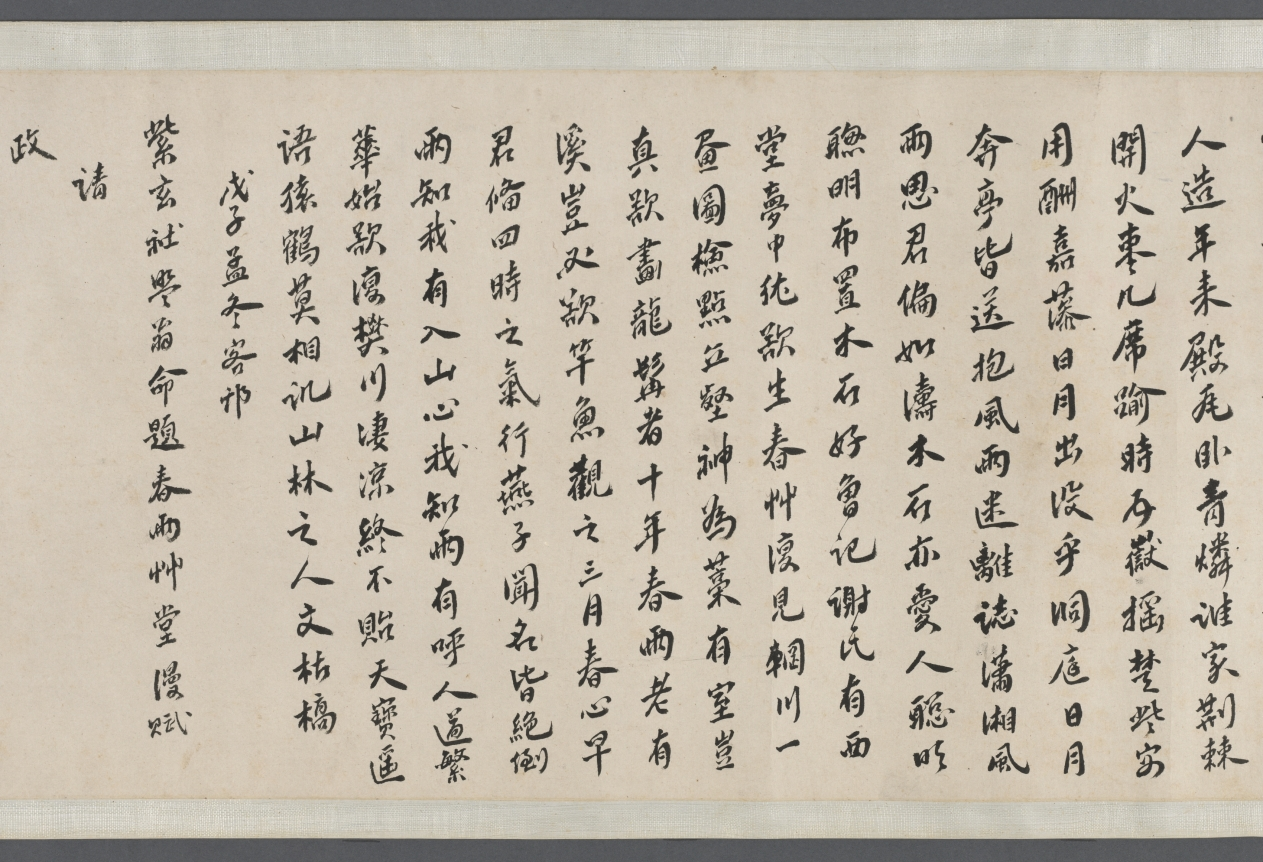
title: Spring Rain Thatched Hut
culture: China, Qing dynasty (1644-1911)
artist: Wang Jianzhang (Chinese, active 1621–1662)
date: 1650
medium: handscroll, ink on paper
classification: Drawing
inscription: Title by Wu Zhiying 吳芝瑛 (1868–1933), dated 1910.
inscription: 春雨草堂圖。庚寅仲春，為紫玄社兄畫於若耶溪上。 仲初王建章。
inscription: 12 colophons by Gong Weiliu’s 宮偉鏐 (1611–1680) contemporaries: Fang Gongqian 方拱乾 (1596–1667, jinshi of 1628); Jiang Cai 姜埰 (1607–1673); Liang Yizhang 梁以樟 (1608–1665); Du Shaokai 杜紹凱 (also named Du Jie 杜岕, 1617–after 1689), dated 1648; Zhao Kaixin 趙開心 (d. 1663), dated 1647; Zhao Erbian 趙而忭 (d. 1658); Yu Yaoguang 余耀光, dated 1649; Yao Quan 姚佺, dated 1648; Chen Taisun 陳台孫 (b. 1611, jinshi of 1640); (Monk) Shao 韶; Du Zhujin 杜祝進; and Tang Shi 唐時.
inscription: 此研田莊居士王建章為先太史紫元公所作春雨草堂圖也。居士字仲初，明崇禎間人，與先太史及惲香山相友善。喜畫佛像，自謂不讓李公麟。山水祖述董源，筆力雄健，有不可羈勒之概。香山稱其墨有五采，非世人所知。然性廉重，非同志不輕落筆，人得其寸圖尺縑，必相與忻賞，如獲蜼彝兕敦，非人世間物也！見先太史筆記，此圖寫雨景，而氣韻生動，勃勃於不能止。每一展覽，覺滿紙雲烟，墨瀋猶濕，如寫吾先人胸中未盡之邱壑也。圖後題詠，多一時名手，想見文采風流之盛。迄今二百餘年，舊德先疇，遺風未沫。吾子孫其永寶之，如與吾先人接謦咳於一堂，為感思之助，其敢作圖畫觀乎！同時香山亦有圖佚去己久，不知異日能為延津之合否。壬申長夏本昂重裝敬識。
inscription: Collectors' seals including: Gong Ben'ang 宮本昂 (1821–1874); Lian Qian 廉泉 (1868–1932); Wu Zhiying 吳芝瑛 (1868–1933)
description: With its striking simplicity, this painting captures the pure serenity of a private garden in the moist atmosphere of a spring morning on a small river. Painted in the style of Ni Zan, Wang Jianzhang dedicated this work to his patron-friend Gong Weiliu (1611-1680). Gong retired from government service after the fall of the Ming dynasty and constructed a garden-retreat at his native home in Taizhou, Jiangsu province. He invited scholars and poets from his literary society to contribute writings of his estate, which are here mounted together with the painting in this scroll.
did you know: Gong Weiliu, the owner of the estate portrayed here, had received his prestigious jinshi degree in 1643, but his official career was thwarted by the collapse of the Ming dynasty the following year.